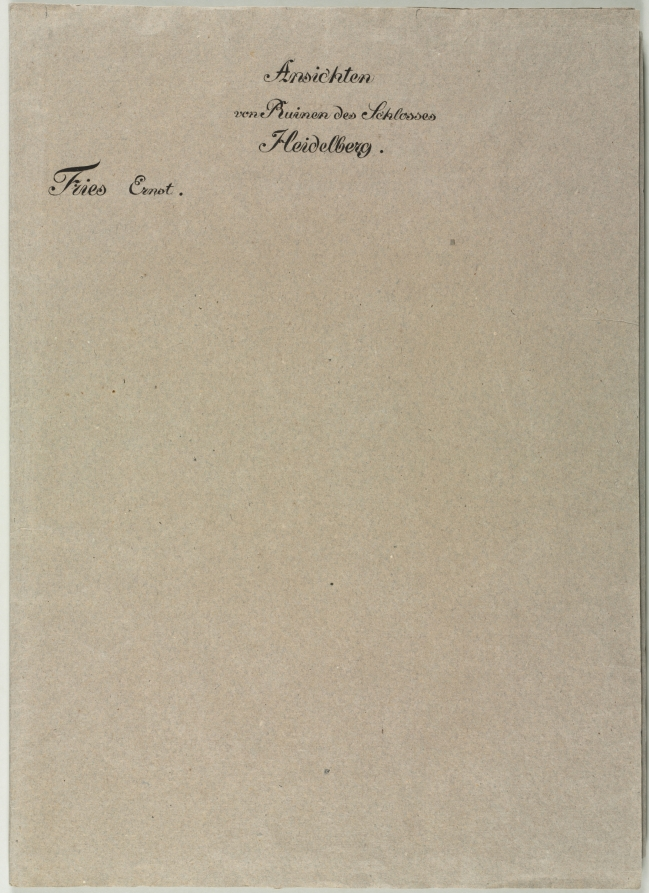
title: Six Views of Heidelberg Castle: Wrapper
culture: Germany, 19th century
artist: Ernst Fries (German, 1801–1833)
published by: Mohr & Winter, Heidelberg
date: 1820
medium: gray paper wrapper for bound group of 6 lithographs with etched and engraved cover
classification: Print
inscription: Inscribed in German on recto in pen and brown ink with title and artist's name In print: Ansichten von Ruinen des Schlosses Heidelberg Fries Erst.